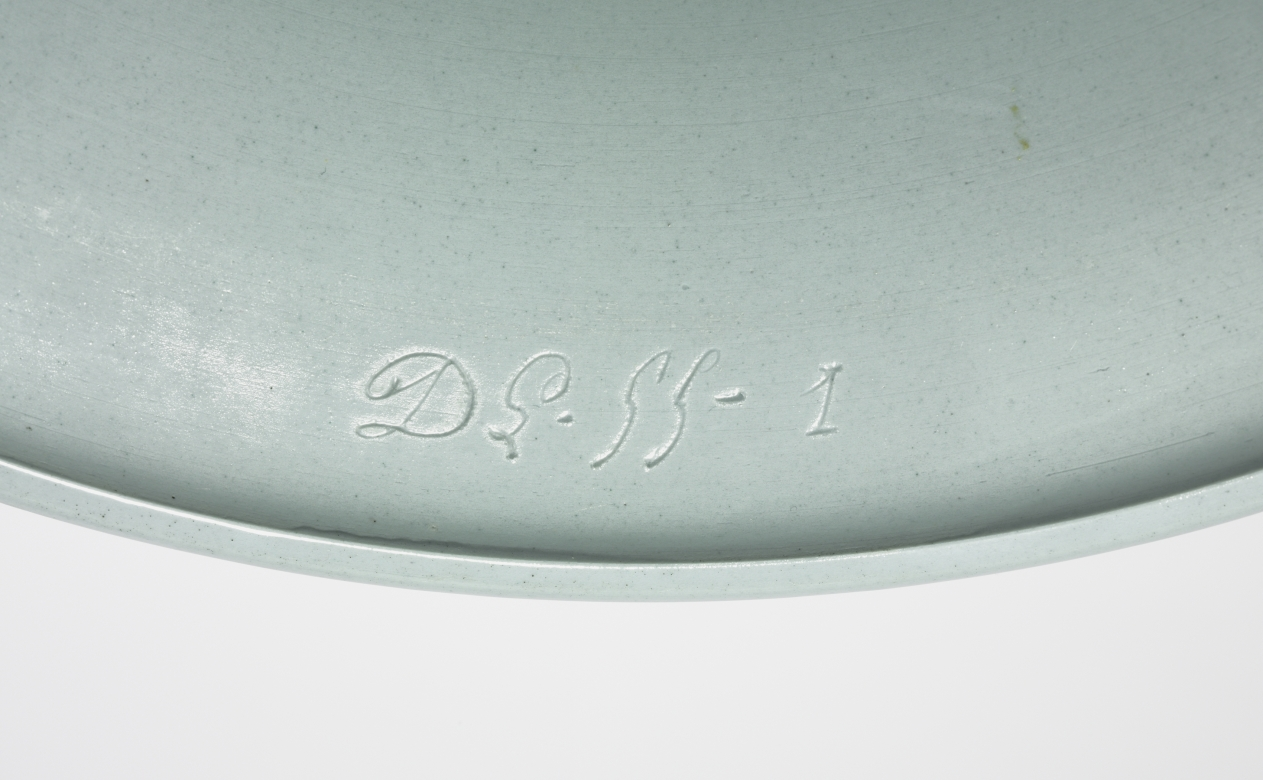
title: Vase Bertin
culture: France, 19th century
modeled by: Jules-Constant Peyre (French, 1811–1870?)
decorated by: Léopold Jules Gély (French)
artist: Sèvres Porcelain Factory (French, est. 1756)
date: c. 1855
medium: porcelain with pâte-sur-pâte decoration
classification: Ceramic